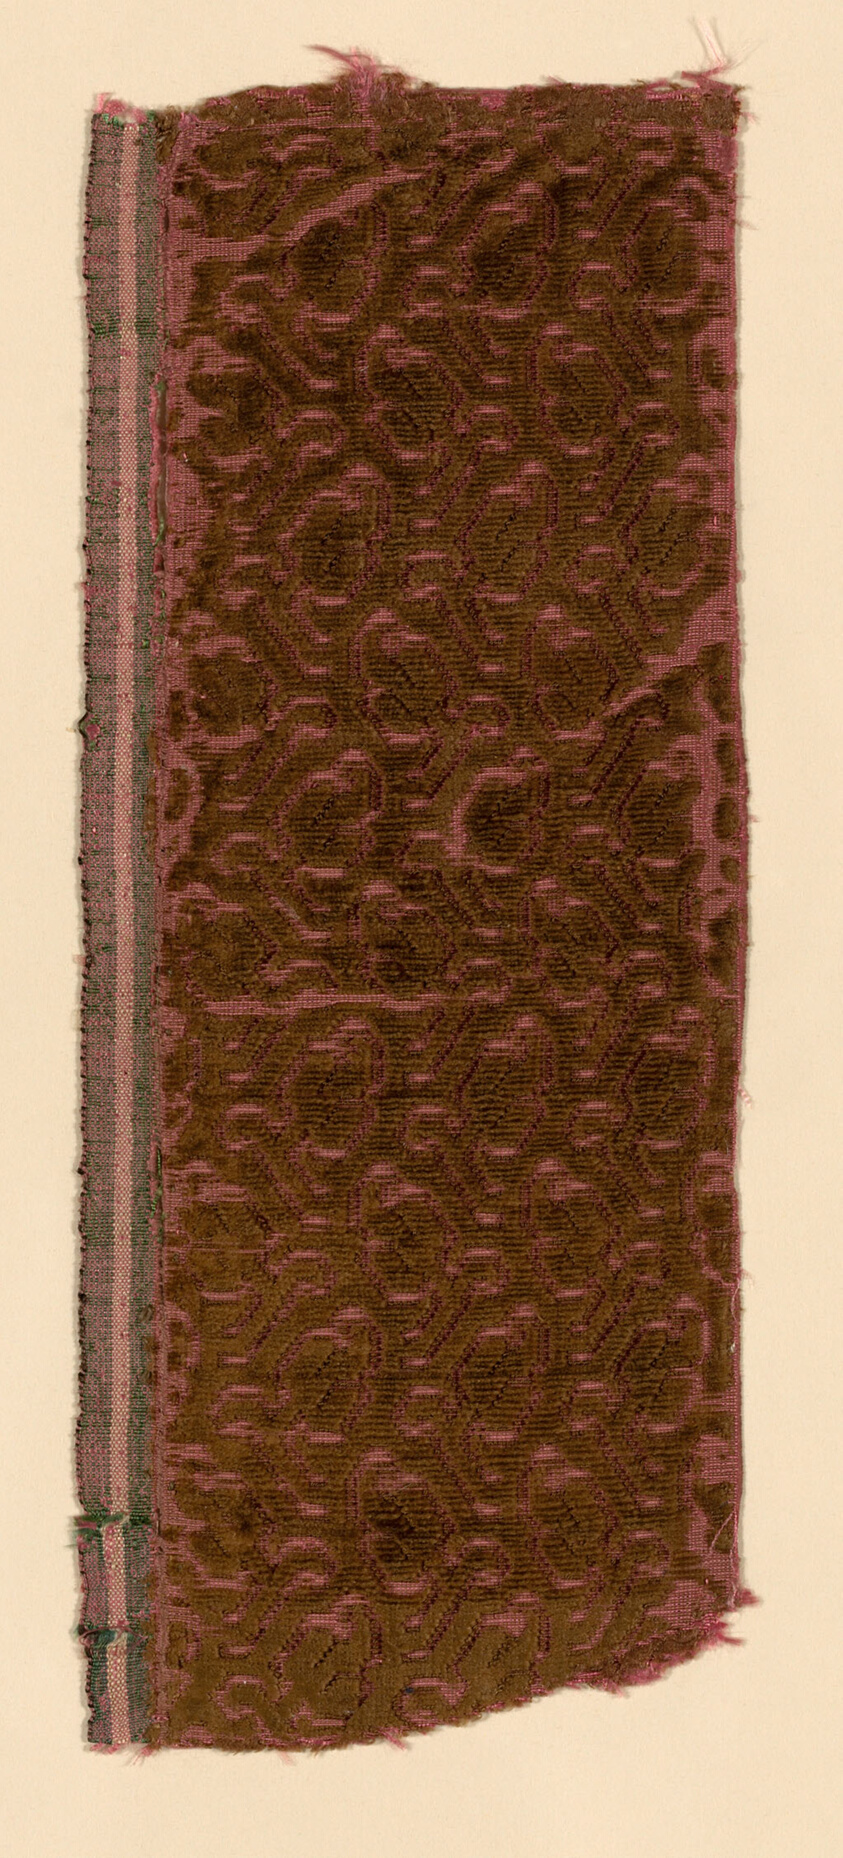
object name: Textile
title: Fragment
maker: Italy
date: 1600/25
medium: Silk; cut, uncut, and voided velvet on plain weave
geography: Italy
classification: textile; weaving - velvet; weaving